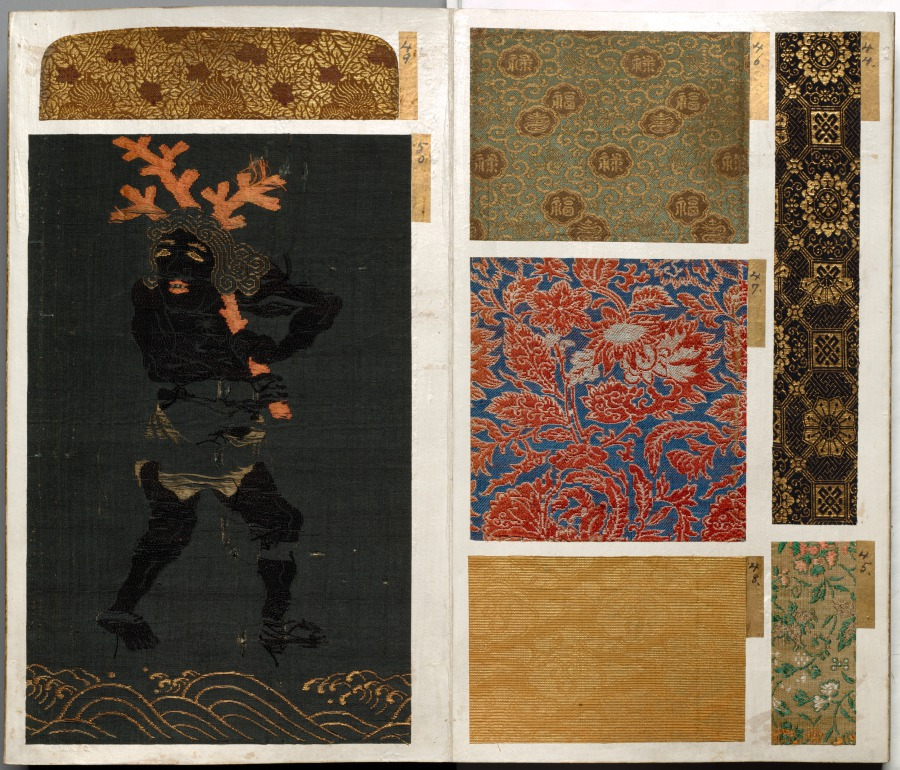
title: Album of Textile Samples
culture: Japan, Edo period (1615–1868)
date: 1600s-1700s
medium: silk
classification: Textile